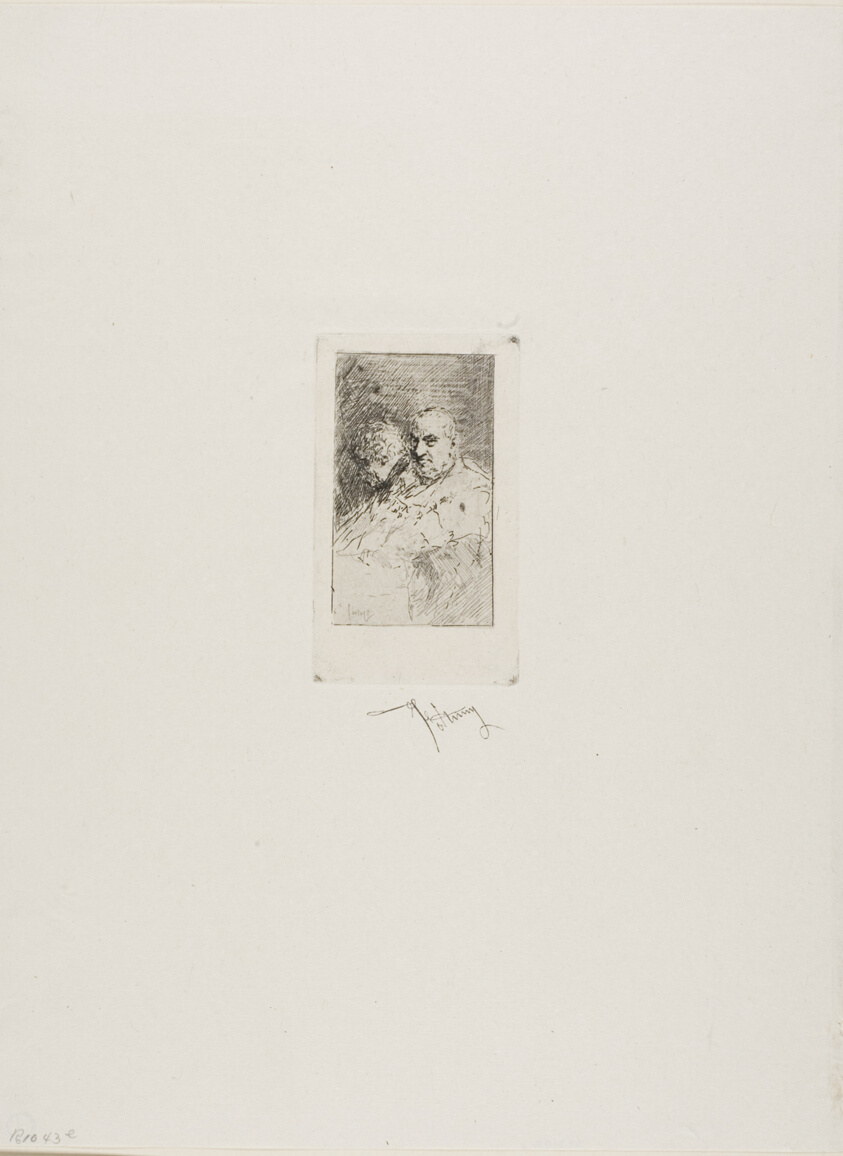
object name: Print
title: Two Cardinals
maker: Mariano José María Bernardo Fortuny y Carbó; Spanish, 1838-1874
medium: Etching on paper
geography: Spain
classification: etching; print; prints and drawing